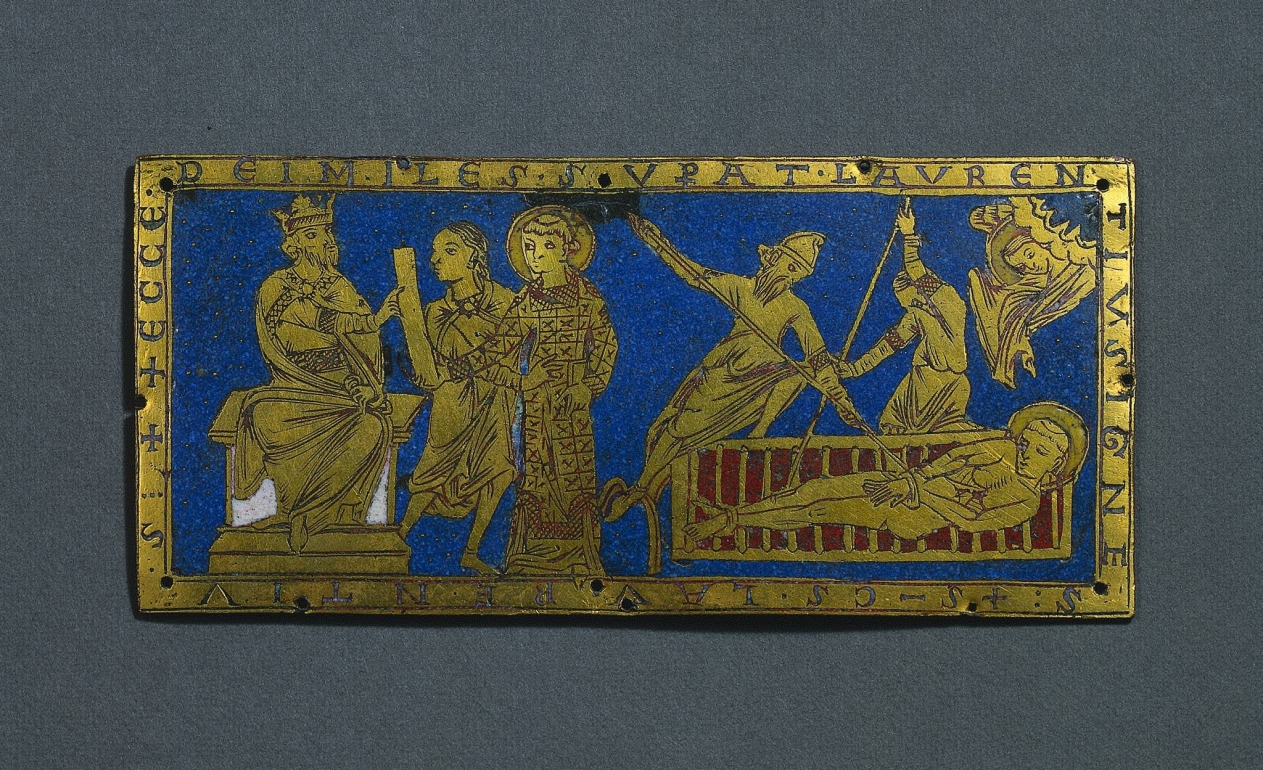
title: Condemnation and Martyrdom of Saint Lawrence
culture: Germany, Lower Saxony, Hildesheim?, Romanesque period, 12th century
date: c. 1180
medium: gilded copper, champlevé enamel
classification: Enamel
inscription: running inscription on the borders: ECCE / DEI MILES SVP(er)AT LAVREN/TIVS IGNE/S (Behold, the warrior of God overcomes the flames) S(an)C(tu)S LAVRENTIV/ S.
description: Champleve enameling is a process in which the artist carves designs into copper plates, and then powdered glass is applied before firing in a furnace, causing the glass to fuse into enamel. In this case, the copper was then gilded and polished. This type of enameling is still done today, mostly for jewelry and decorative items.